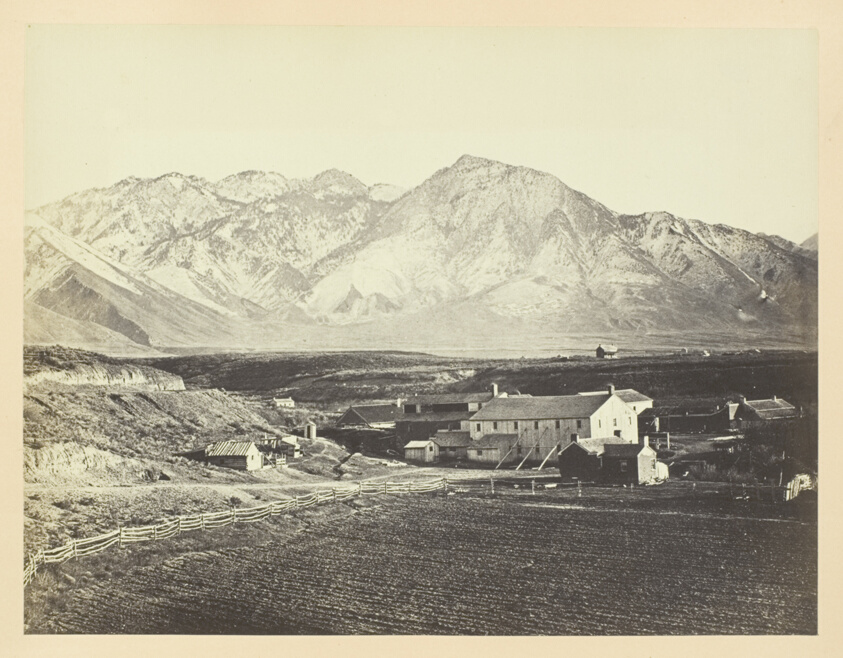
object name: Photograph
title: Wasatch Range of Rocky Mountains, From Brigham Young's Woolen Mills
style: 19th century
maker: Andrew J. Russell; American, 1830–1902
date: 1868/69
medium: Albumen print, pl. XXV from the album "Sun Pictures of Rocky Mountain Scenery" (1870)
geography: United States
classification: photograph; albumen silver print; photography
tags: Collected by Hugh Edwards